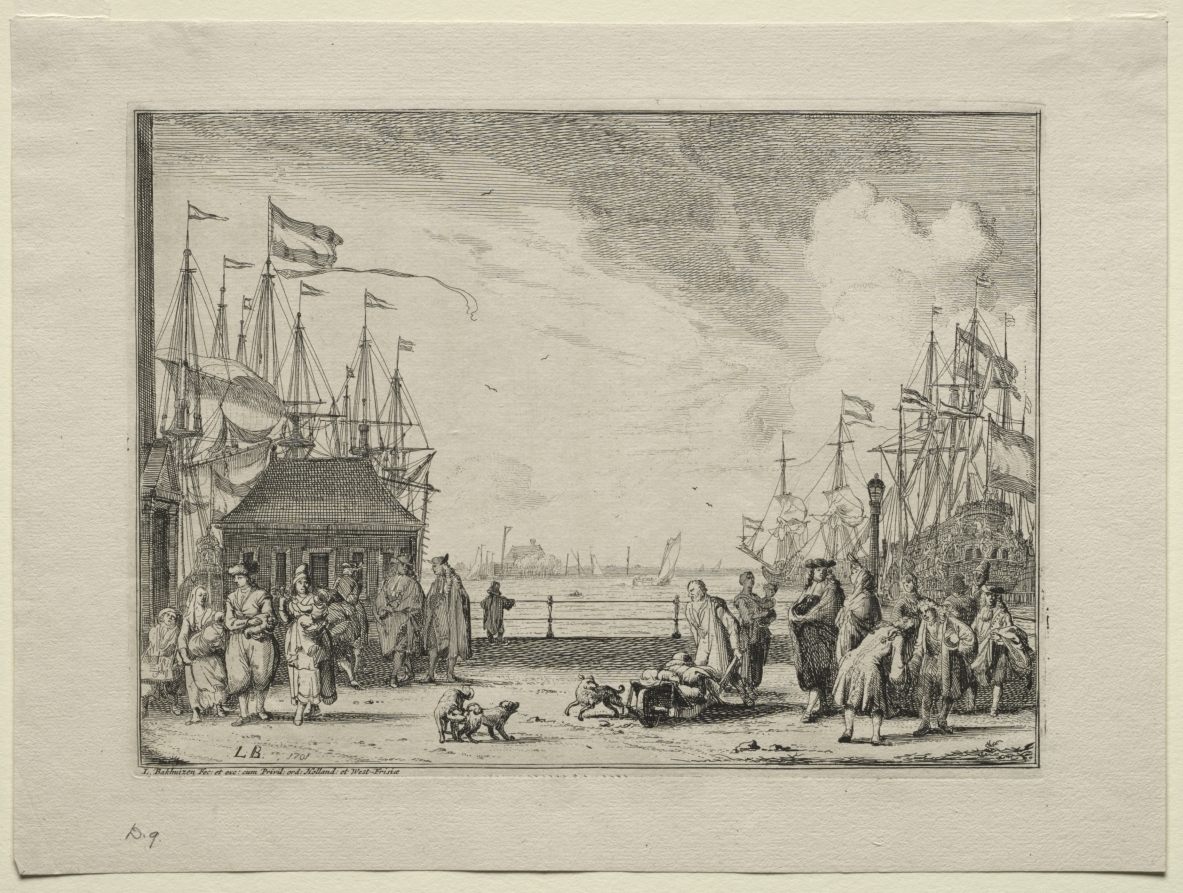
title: Port at Amsterdam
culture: Netherlands, early 18th century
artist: Ludolf Backhuysen (Dutch, 1631–1708)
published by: Ludolf Backhuysen (Dutch, 1631–1708)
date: 1701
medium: etching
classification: Portfolio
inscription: lower left, in plate: L B 1701 ; L. Bakhuizen Fec: et exc: cum Privil: ord: Hollland: et West-Frisiæ ; lower left, in graphite: D.9.